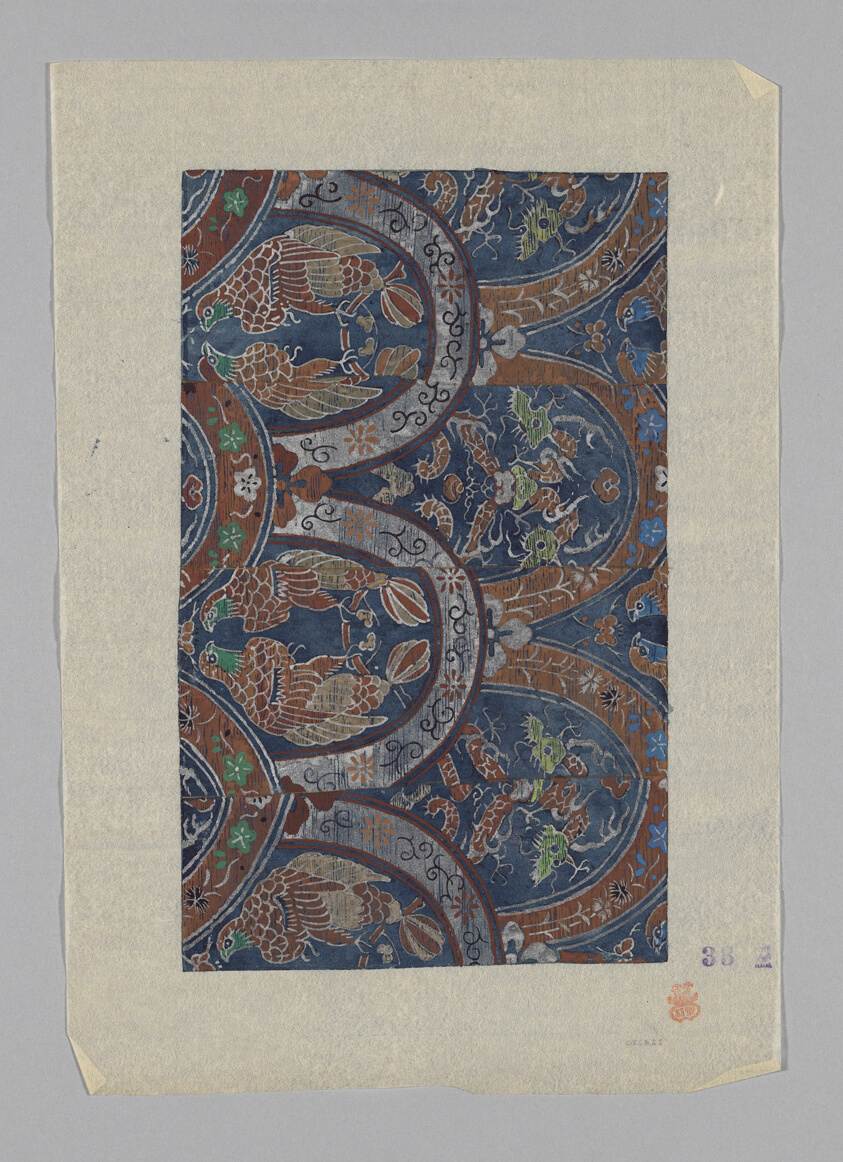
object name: Drawing and Watercolor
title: Design on Paper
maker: Japan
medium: Paper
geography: Japan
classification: textile; accessory - paper design; watercolor; paper